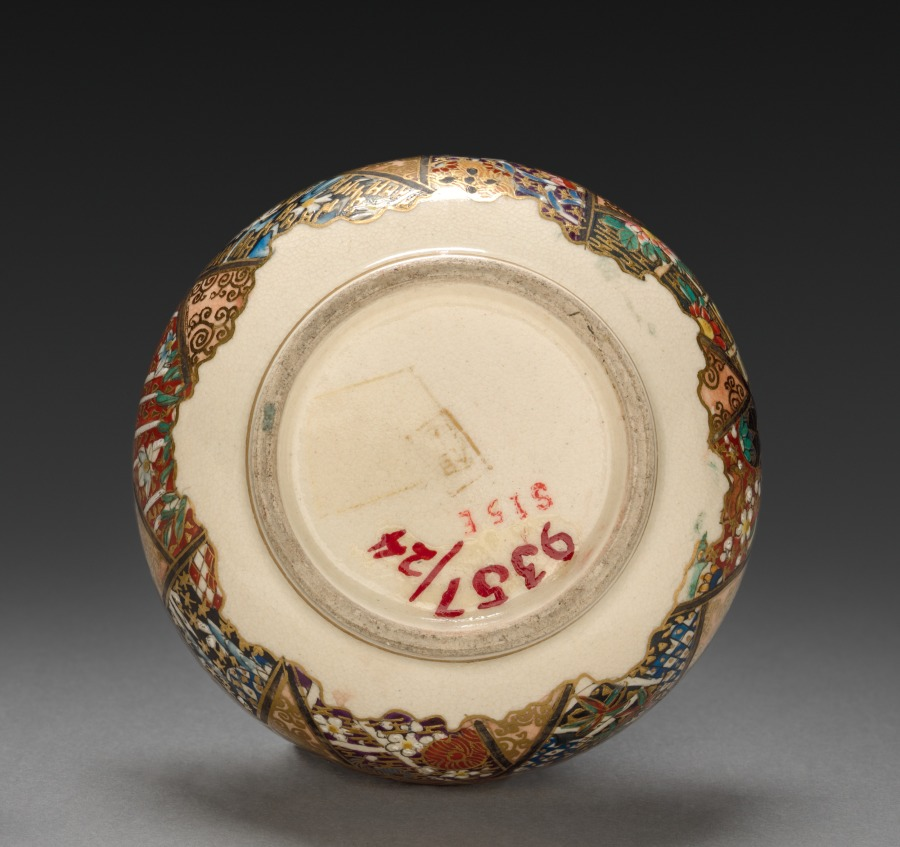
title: Covered Dish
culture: Japan, Meiji period (1868–1912)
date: early 1900s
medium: Kutani ware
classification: Ceramic